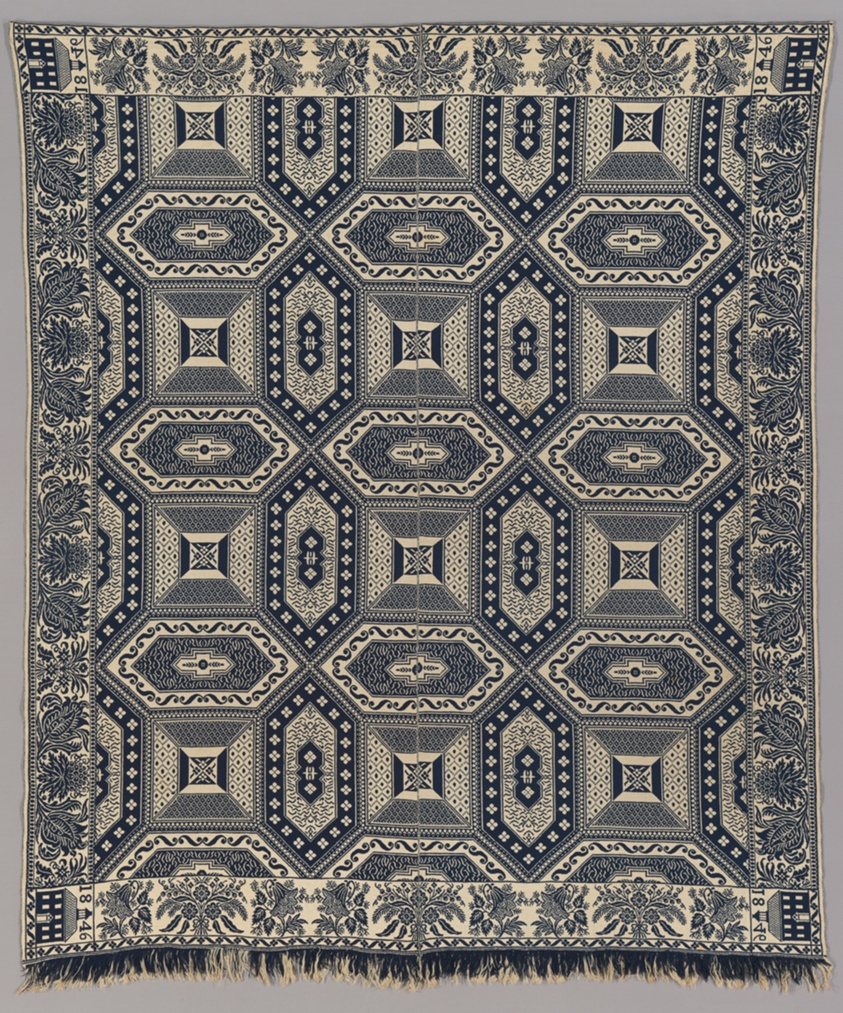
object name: Textile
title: Coverlet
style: 19th century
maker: William Craig, Sr. (American, 1800–1880); United States, Indiana, Decatur County, Greensburg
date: 1846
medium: Cotton and wool, plain weave double cloth; woven on loom with Jacquard attachment; main warp fringe; two loom widths joined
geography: Decatur County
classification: weaving - coverlet; coverlet; textile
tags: geometric, squares, triangles, scrolls (motifs), buildings, foliage, flowers, coverlet